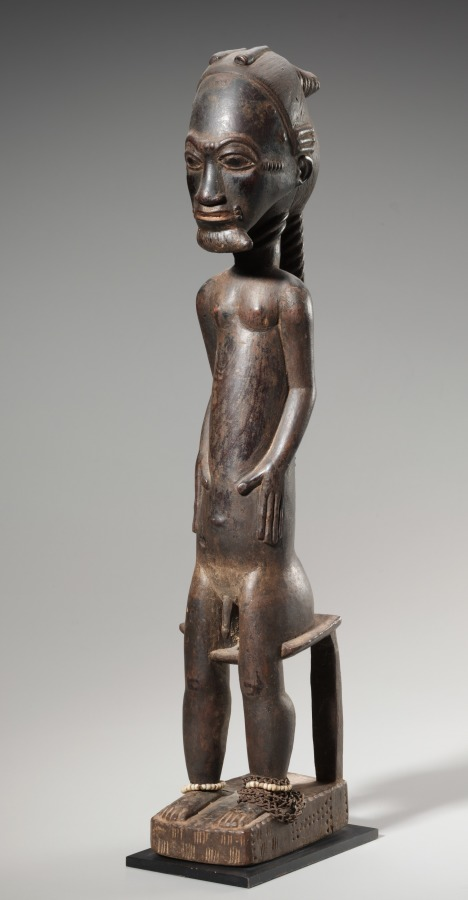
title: Figure Pair (asye usu)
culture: Africa, West Africa, Côte d’Ivoire, Baule-style carver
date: late 1800s–early 1900s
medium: Wood, resin, glass beads, plant fiber, and metal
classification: Sculpture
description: Baule figures carved as pairs usually represent untamed spirits of the wilderness called asye usu. These spirits may intervene in the lives of individuals by taking possession of them. If this possession does not result in madness, it can lead to the human host’s becoming a diviner who can enter into a trance to reveal the causes of ailments and other misfortunes. People who feel their lives are being interrupted by the asye usu commission carvings representing idealized male and female forms whose grace and beauty in both anatomy and adornment will seduce the spirits and compel them to use the sculptures as their temporary homes.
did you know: Baule artists looked to the world around them to capture contemporary ideas and ideals of beauty; these figures have hairstyles that would have been worn when the sculptures were carved.